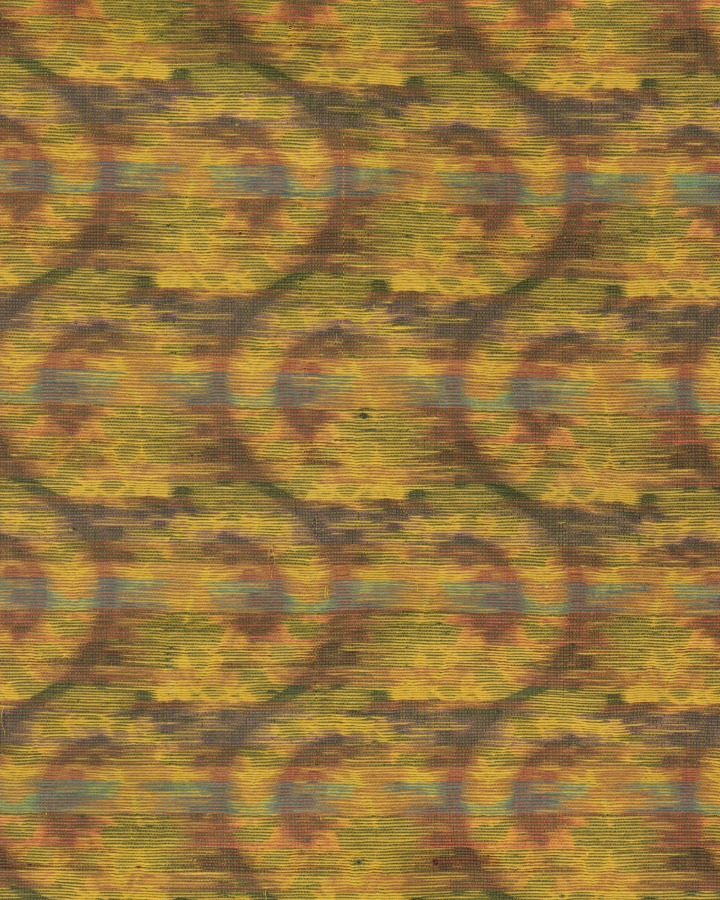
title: Two Loom Widths Sewn Together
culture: Iran, 19th - early 20th century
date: 1800s - early 1900s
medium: compound weave with silk and metal tread weft brocade; loom width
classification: Textile